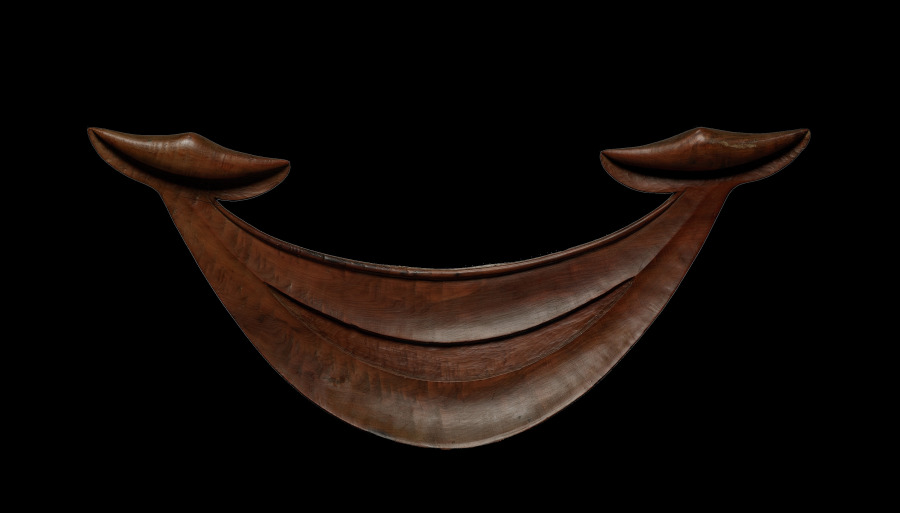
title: Gorget (Rei Miro)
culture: Pacific Islands, Polynesia, Rapa Nui (Easter Island)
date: 1800s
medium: wood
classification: Sculpture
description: Elegant, crescent-shaped gorgets or chest ornaments known as rei miro (“necklace of wood”) were generally worn by chiefly women of Rapa Nui (Easter Island). The abstracted forms at the tips of this example replace the human heads that are more typical.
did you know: Chiefly women of Rapa Nui (Easter Island) wore crescent-shaped gorgets like this one.